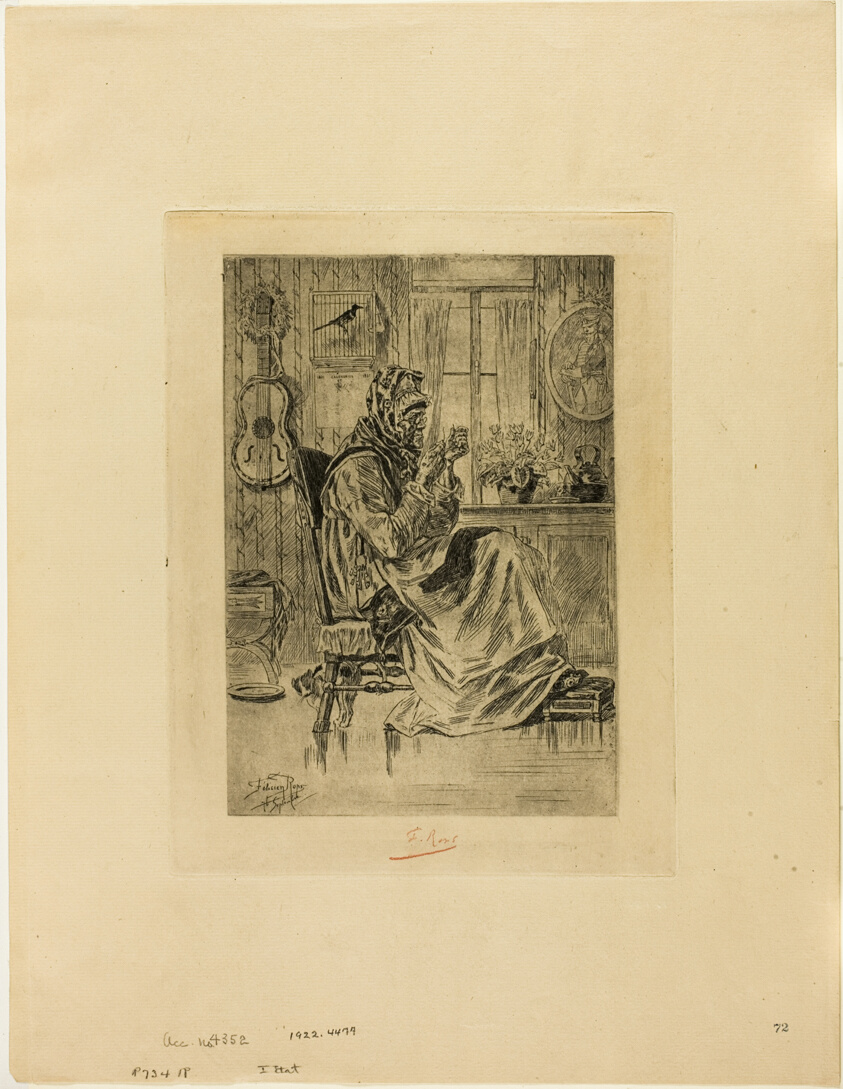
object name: Print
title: Old Woman with a Needle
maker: Félicien Rops (Belgian, 1833-1898)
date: September 1876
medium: Heliogravure on cream laid paper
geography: Belgium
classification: photogravure; print; prints and drawing